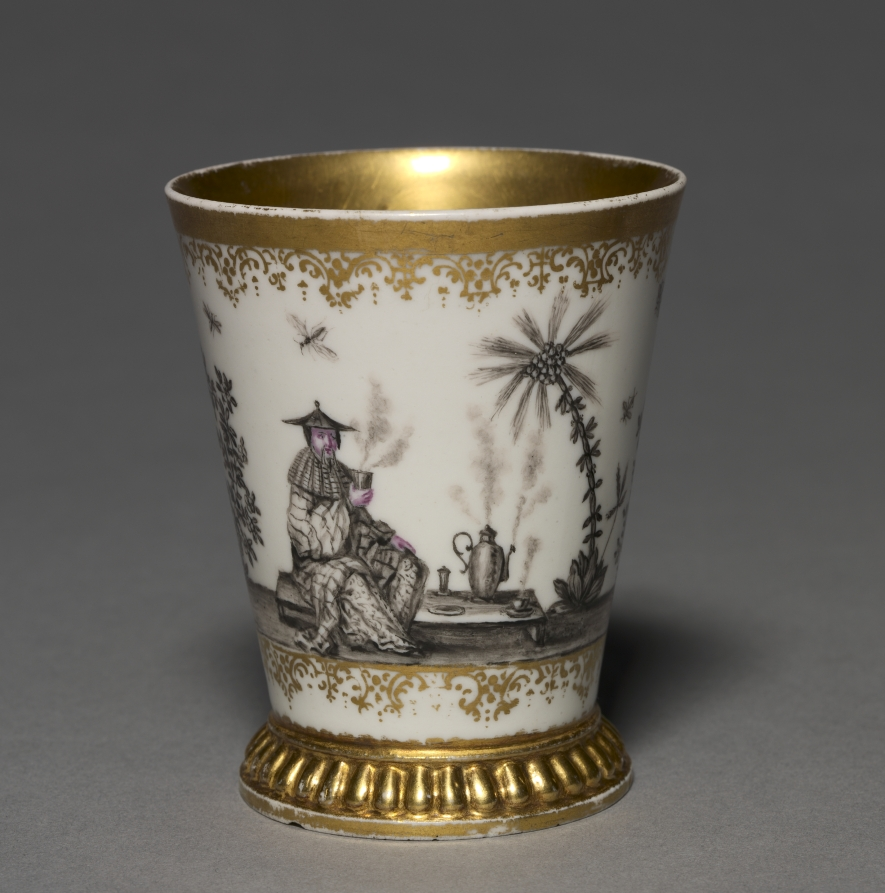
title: Beaker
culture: Germany, Meissen, early 18th century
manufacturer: Meissen Porcelain Factory (German, est. c. 1710)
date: before 1720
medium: porcelain, interior gilded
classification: Ceramic